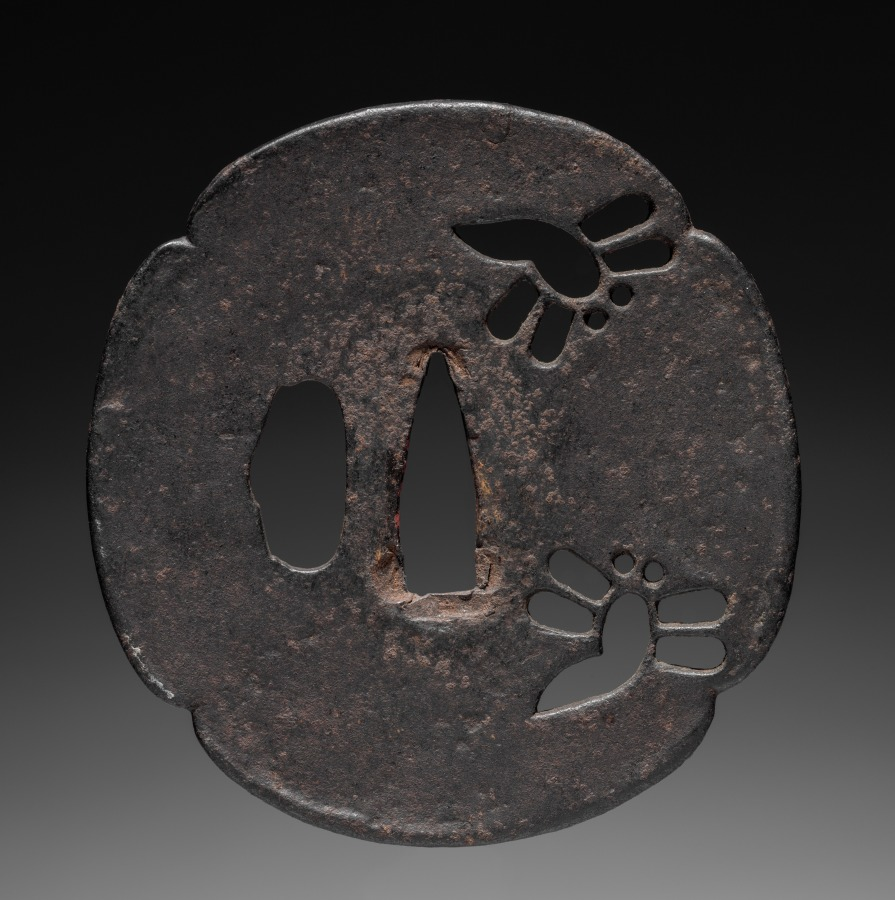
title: Sword Guard (Tsuba) with Dragonflies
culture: Japan, possibly Edo period (1615-1868)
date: c. 1615–1868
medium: iron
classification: Arms and Armor